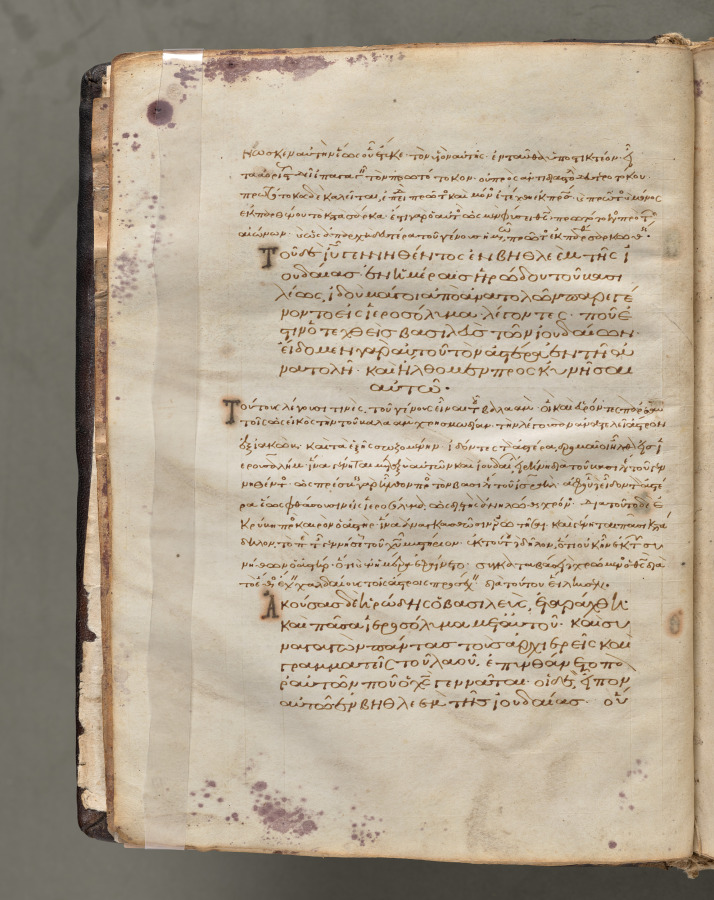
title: Text, folio 9 (verso), from a Gospel Book with Commentaries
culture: Byzantium, Constantinople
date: c. 1000–1100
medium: ink, tempera, and gold on vellum; leather binding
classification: Bound Volume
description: Each of the four gospels in this book opens on a page with brilliantly illuminated borders depicting the author of the text as well as birds-principally peacocks, symbols of the immortality of the soul-and fountains, representing the fountain of life and the salvation of the soul. This volume consists of 428 leaves with texts in Greek. Its level of sophistication suggests that it was probably written and decorated in a monastery in Constantinople.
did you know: Gospel Books were carried in procession through Byzantine churches.